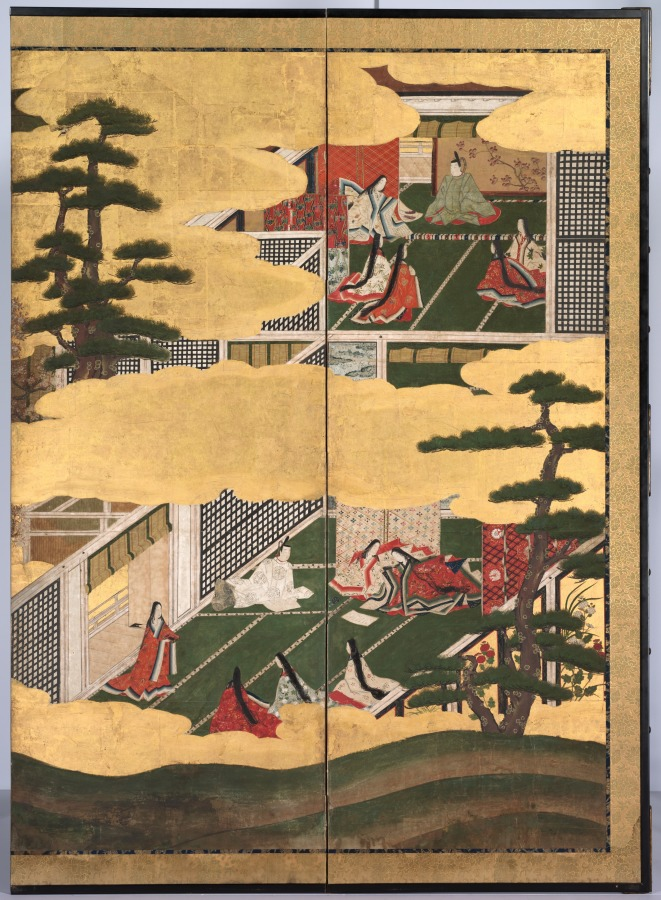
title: Scenes from the Tale of Genji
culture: Japan, Edo period (1615–1868)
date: late 1700s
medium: One of a pair of six-panel folding screens; ink and color on gilded paper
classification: Painting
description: Folding screens served as temporary dividers in traditional Japanese open-plan architectural spaces. This pair was inspired by Japan’s most celebrated work of literature, the Tale of Genji, written by Murasaki Shikibu, an attendant to the empress in the early 11th-century imperial court. The novel follows the love life of the “Shining Prince” Genji and delves into the psychological states of his many companions. Distinct episodes are nestled within a matrix of golden clouds and landscape elements. Each screen includes six episodes presented in a nonlinear fashion, capturing scattered highlights of the story.